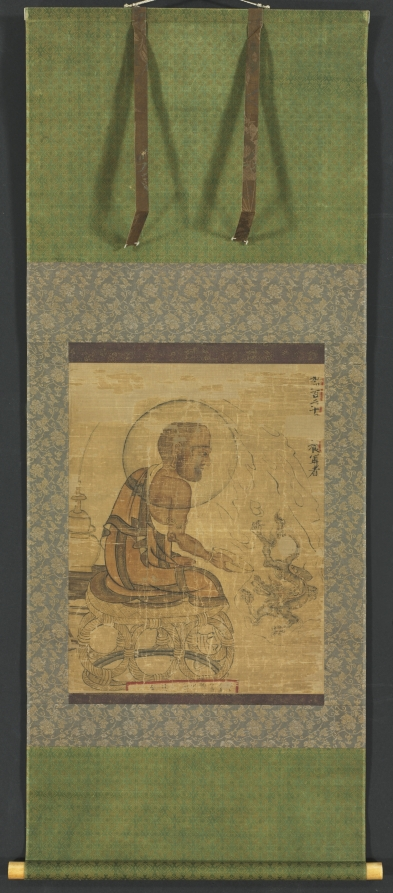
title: Arhat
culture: Korea, Goryeo dynasty (918–1392)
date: 1235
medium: Hanging scroll; ink and slight color on silk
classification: Painting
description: An arhat (Nahan in Korean), an advanced disciple of the Buddha, is represented here in profile with a halo encircling his head. This particular arhat is Segongyang jonja, numbered as the 464th of 500 arhats. He sits on a woven bamboo stool, is luring a dragon into an alms bowl. This hanging scroll is one of only about ten known works that survive today, all of which (except for Cleveland’s piece) are currently preserved in Korea or Japan.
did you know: This painting that depicts an arhat, a human being who has achieved enlightenment, used to be part of a set of 500 hanging scrolls.